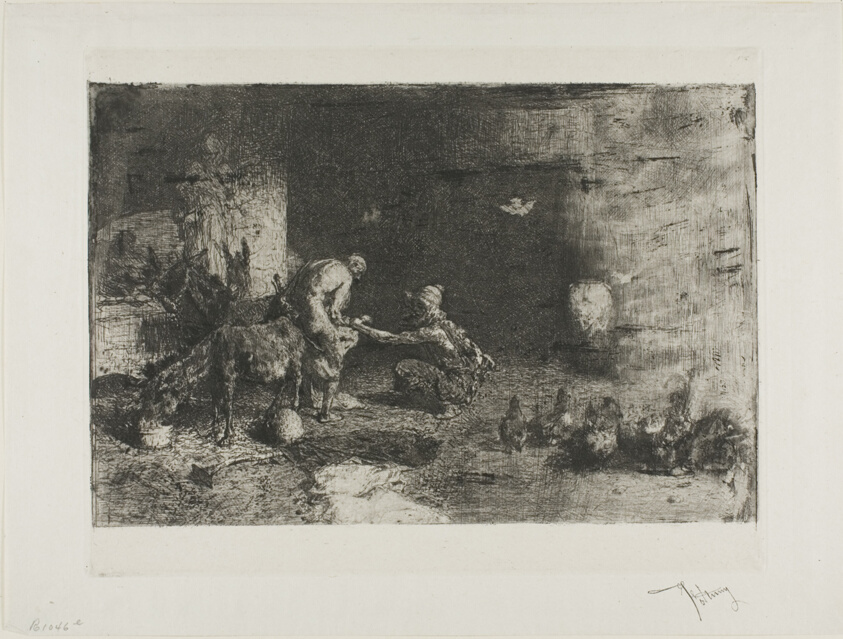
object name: Print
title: Shoesmith in Marocco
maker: Mariano José María Bernardo Fortuny y Carbó; Spanish, 1838-1874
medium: Etching on paper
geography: Spain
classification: etching; print; prints and drawing